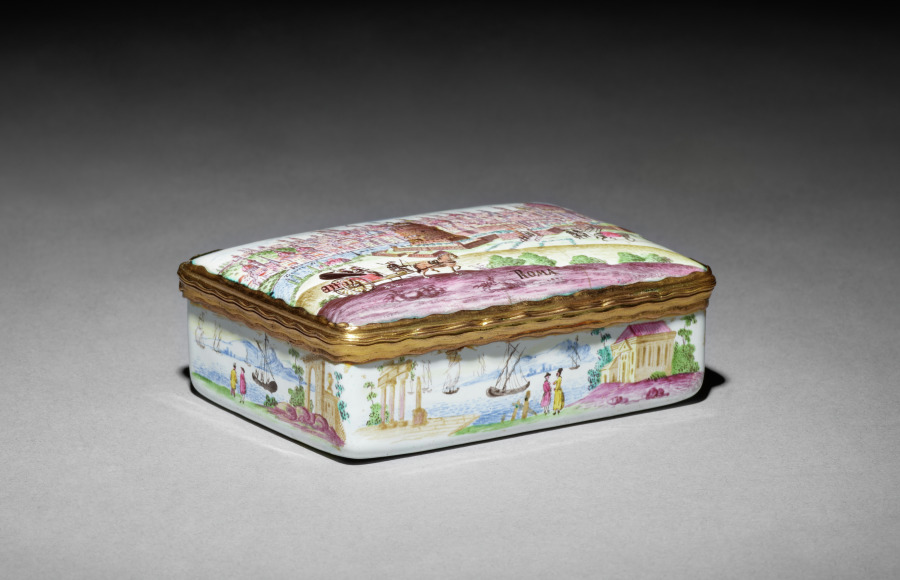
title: Snuff Box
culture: Austria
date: c. 1750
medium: enamel on copper with metal mounts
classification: Miscellaneous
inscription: on top there are a number of inscriptions in black: "Roma," "Trevere R," "C:ST: Ang" (for Castello San Angelo), "S: Pe:" (for San Pietro), "S.G.L." (probably for San Giovanni Laterano). on interior of lid: "WIENNE."